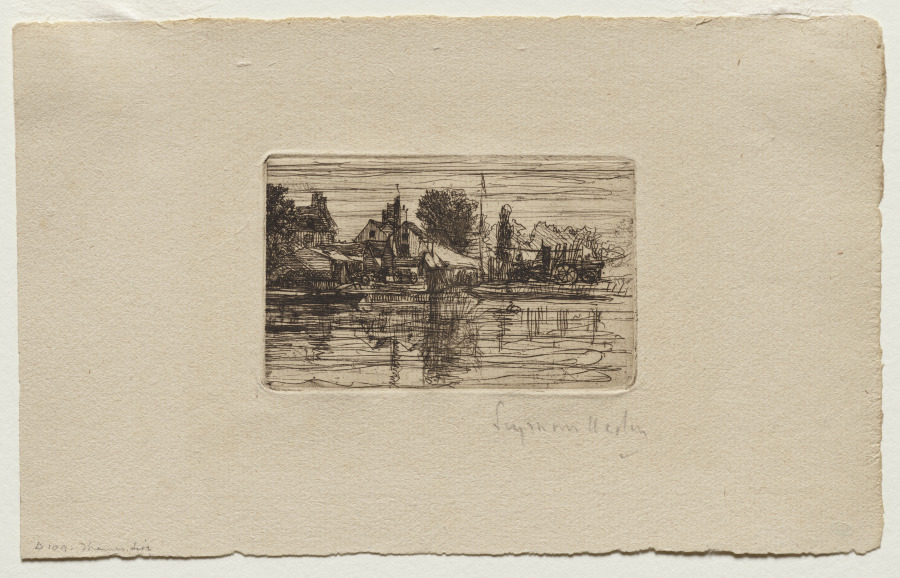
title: Thames Side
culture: England, 19th century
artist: Francis Seymour Haden (British, 1818–1910)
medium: etching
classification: Print